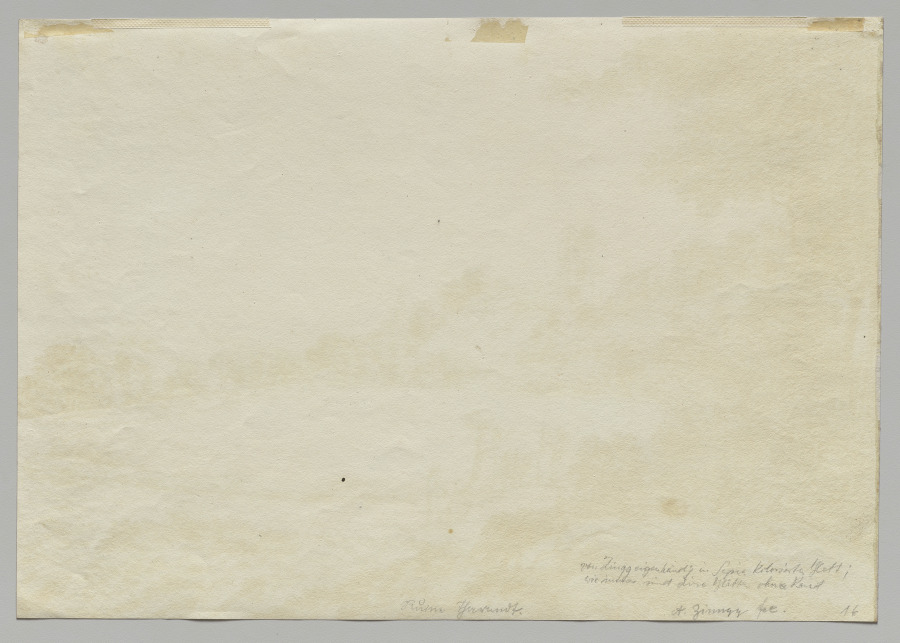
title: Landscape with Tharandt Castle Ruins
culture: Switzerland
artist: Adrian Zingg (Swiss, 1734–1816)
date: c. 1800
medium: Hand-colored and sepia toned etching on wove paper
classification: Print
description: Swiss artist Adrian Zingg made the landscape of Saxony his primary and almost exclusive subject and sought out dramatic views, often featuring the country’s distinctive waterfalls, landscapes, and ruins, to convey its grandeur while maintaining a topographical precision. These two prints depict the ruins of Tharandt castle, a medieval structure outside Dresden. Zingg traveled to the site to sketch with friends, captivated by the juxtaposition between nature’s grandeur and the castle’s impermanence.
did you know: Soon after Adrian Zingg sketched this view in the village of Tharandt, the area became popular among tourists for its dramatic views.